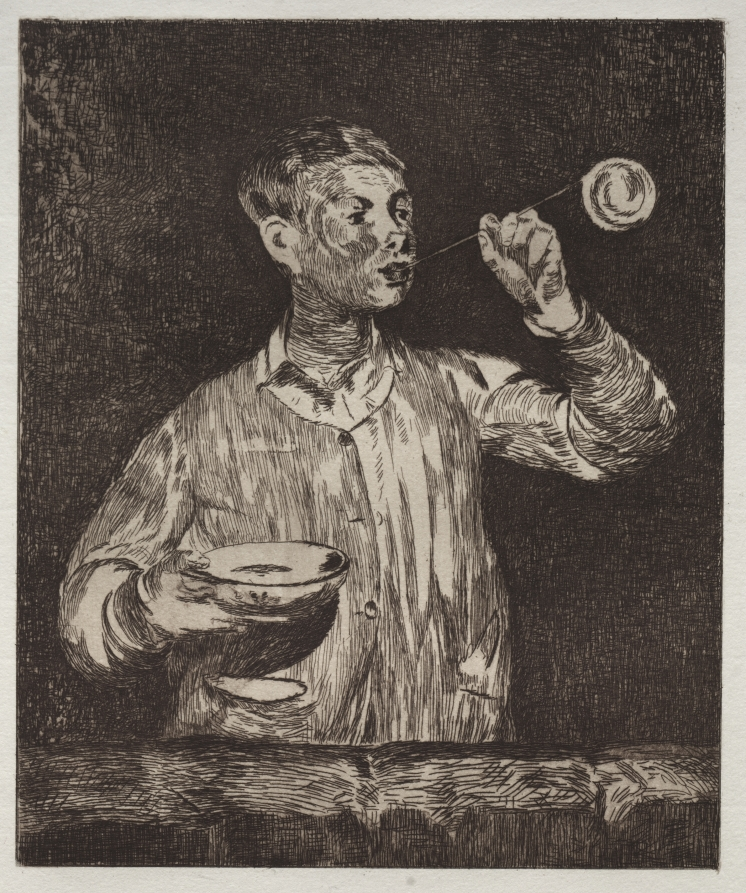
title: The Boy with soap bubbles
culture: France, 19th century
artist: Édouard Manet (French, 1832–1883)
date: 1868–69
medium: etching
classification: Print